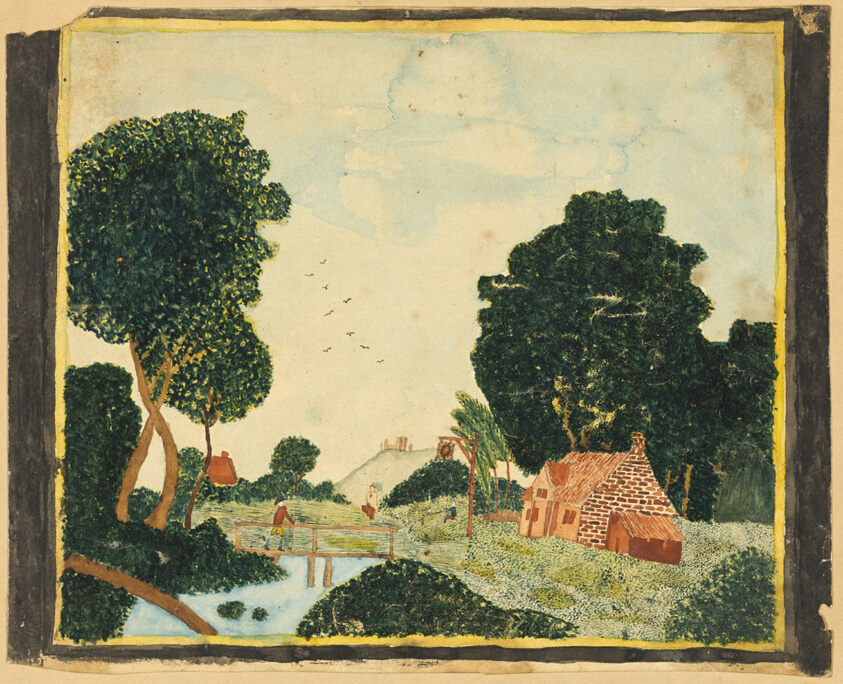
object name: Drawing and Watercolor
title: Landscape with an Inn and a Bridge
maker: Orra Louise White (American, 1796-1863)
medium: Watercolor over graphite on cream wove paper, laid down on tan board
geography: United States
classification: watercolor; drawings (visual works); prints and drawing